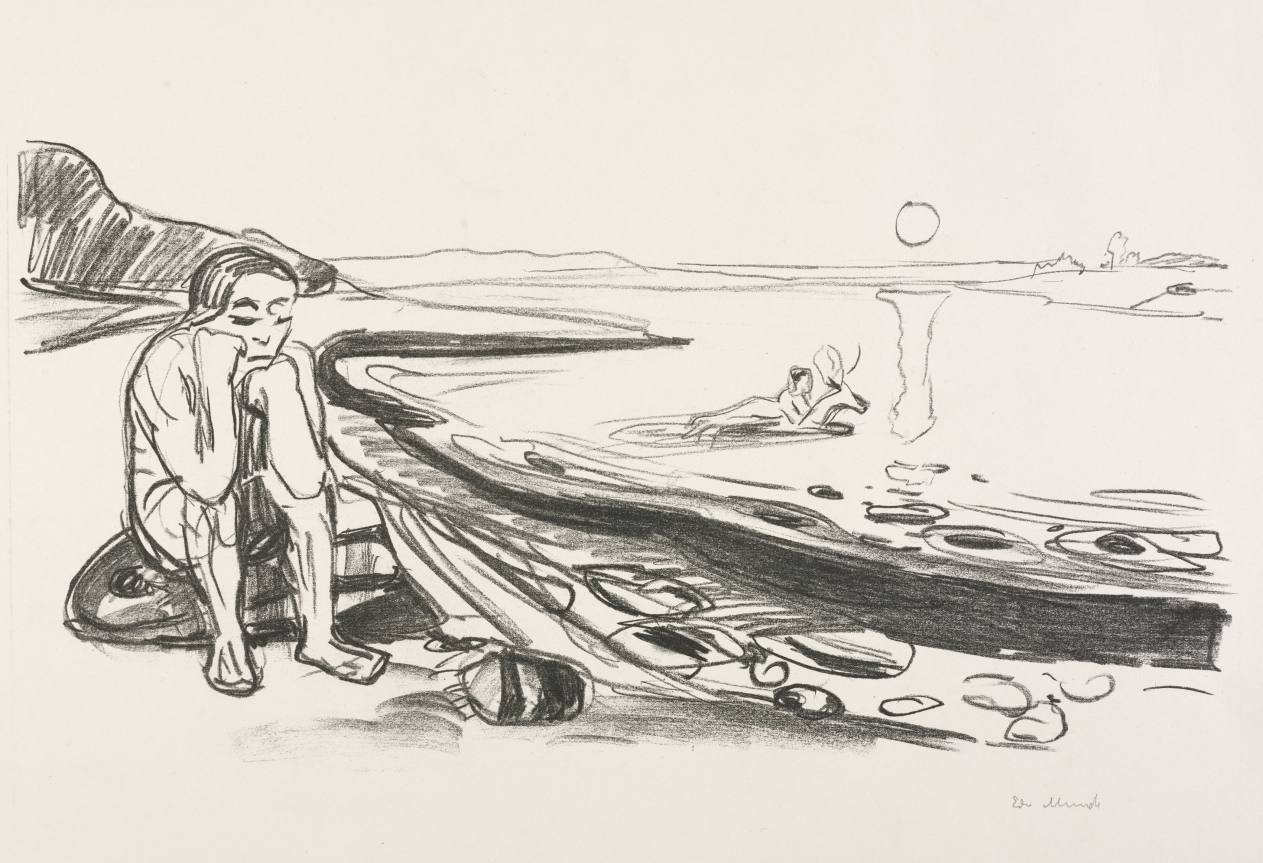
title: Alpha and Omega: Omega's Flight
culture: Norway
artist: Edvard Munch (Norwegian, 1863–1944)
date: 1908–9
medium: lithograph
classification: Print